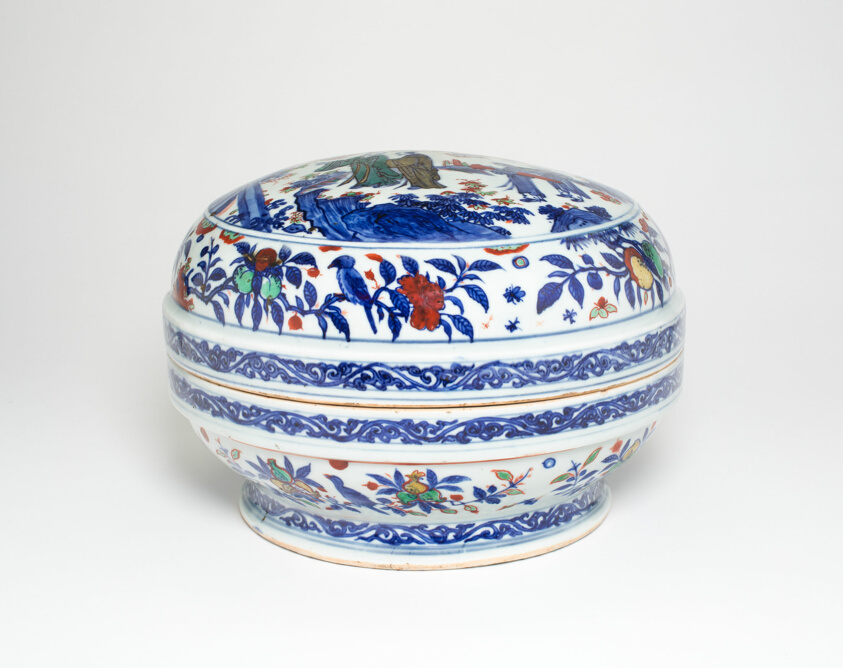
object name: Vessel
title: Covered Box with Scholars in a Garden Encricled by Birds, Fruits, and Flowers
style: Chinese (culture or style)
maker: China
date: Ming dynasty (1368–1644), probably Wanli period (1573–1620)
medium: Porcelain painted in underglaze blue and overglaze enamels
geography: China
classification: porcelain; asian art; ceramics; vessel